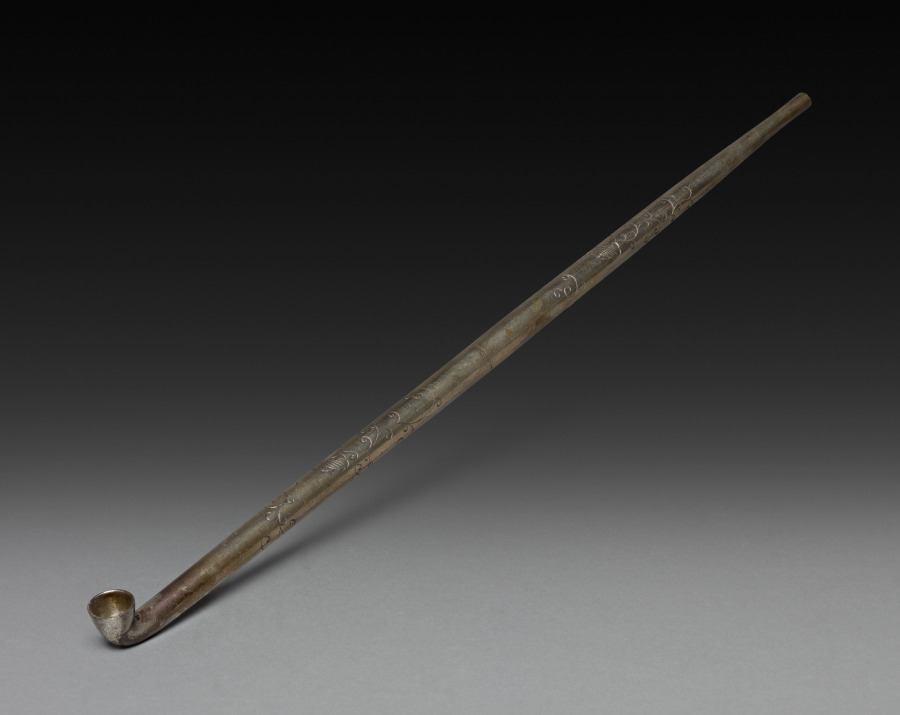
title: Tobacco Pipe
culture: Japan, Edo period (1615–1868)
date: early to mid-1800s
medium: silver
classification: Miscellaneous